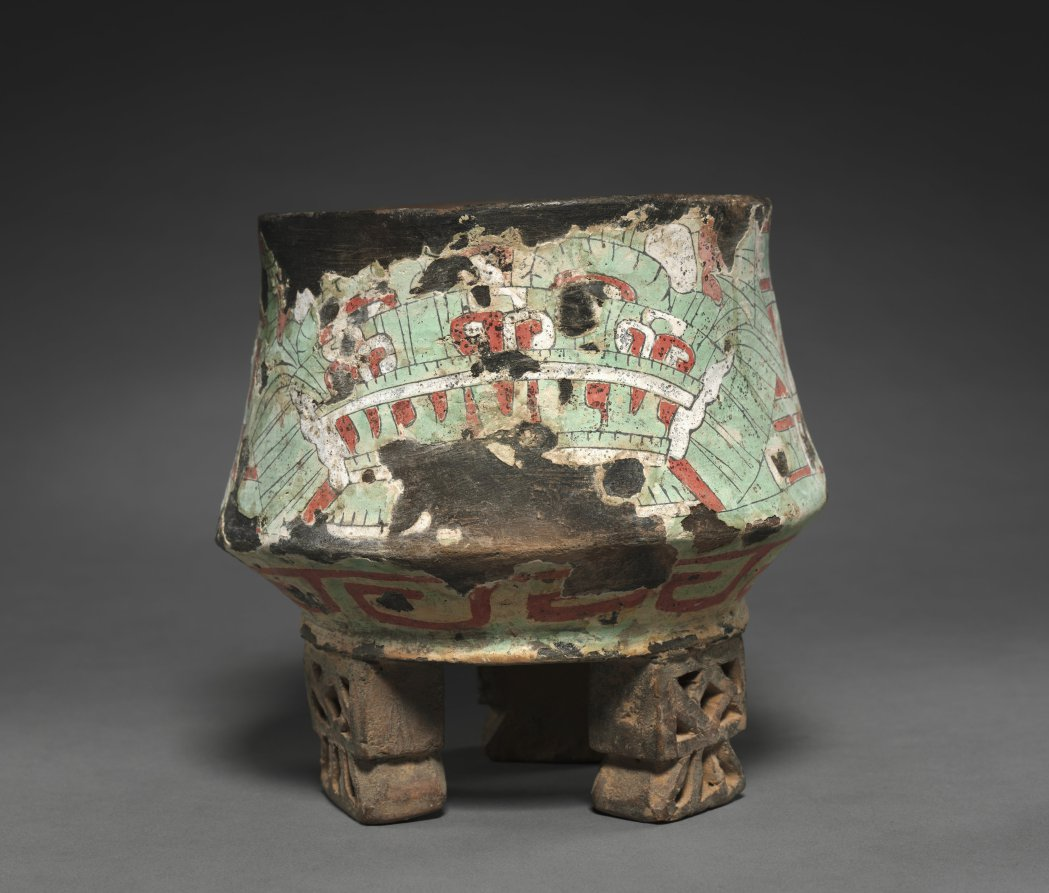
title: Vessel with Butterfly Headdress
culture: Central Mexico, Teotihuacán, Classic period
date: 1–550 CE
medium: ceramic, stucco, pigment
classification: Ceramic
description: The headdress shown on this vessel combines a serpent's mouth with a butterfly's proboscis (feeding tube), which curls between the eyes. The butterfly often appears in the headdress of the Great Goddess, an extremely important Teotihuacán deity. Stucco (paper-thin, painted plaster) is fragile and usually does not survive well; the stucco of the basin in this case has been repaired.